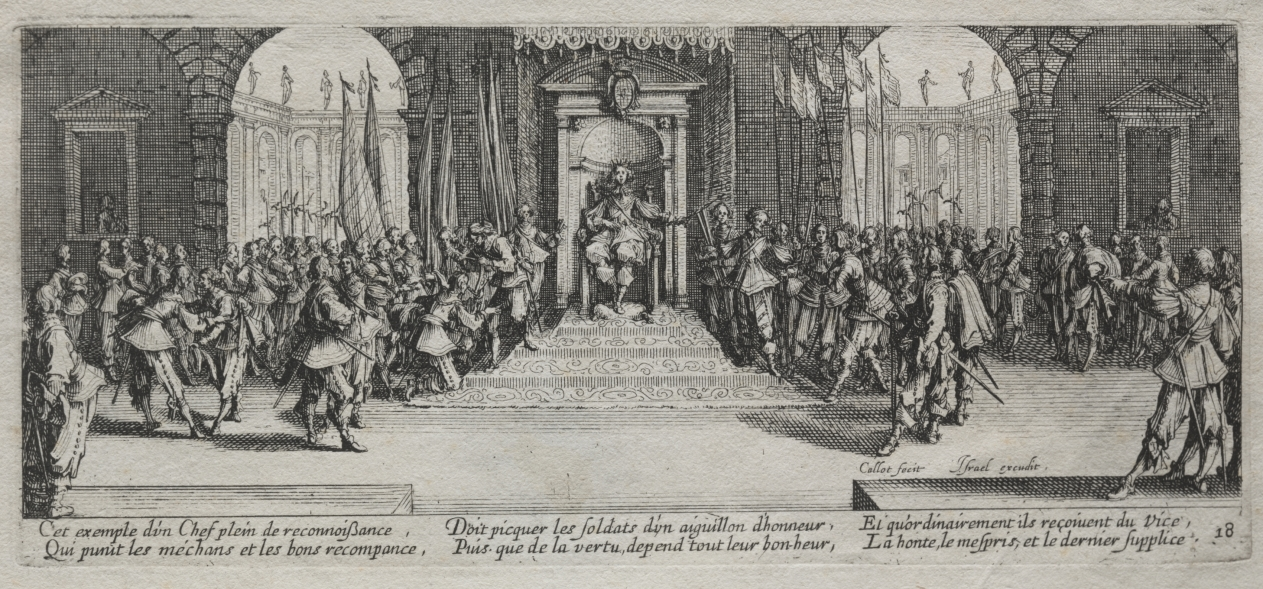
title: The Large Miseries of War: Distribution of Recompense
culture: France, 17th century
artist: Jacques Callot (French, 1592–1635)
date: 1633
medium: etching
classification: Print